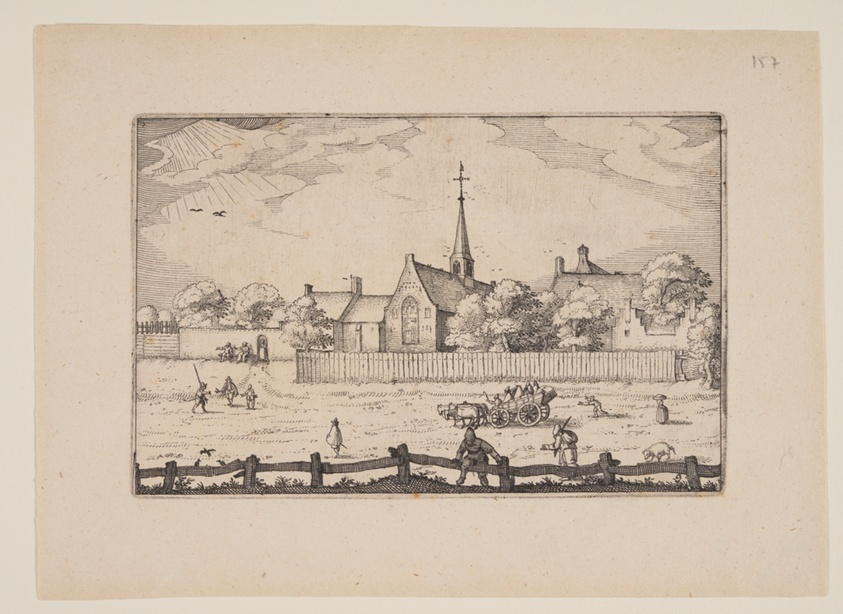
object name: Print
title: The Leper-House at Haarlem, from Views in the Surroundings of Haarlem (Plaisante Plaetsen)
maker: Claes Jansz. Visscher (Netherlandish, c. 1550–c. 1612)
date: 1610/20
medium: Etching on ivory laid paper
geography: Netherlands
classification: print; paper; prints and drawing; etching